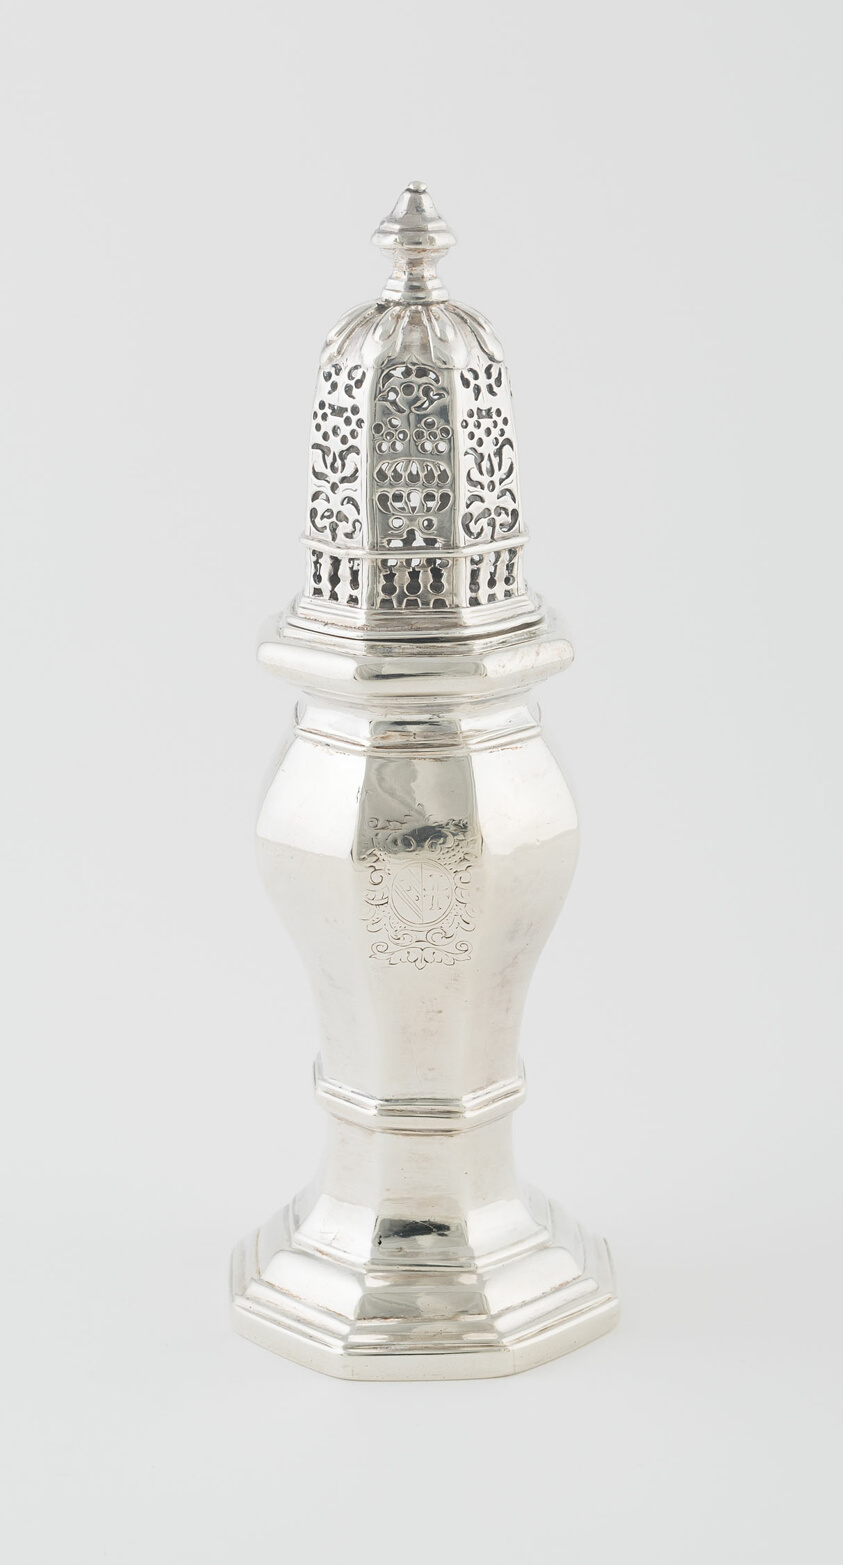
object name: Metalwork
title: Canister (one of three)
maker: Edward Workman; Irish, active 1699-1722; Dublin, Ireland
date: 1704/06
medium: Silver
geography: Dublin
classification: silver; metalwork; european decorative arts